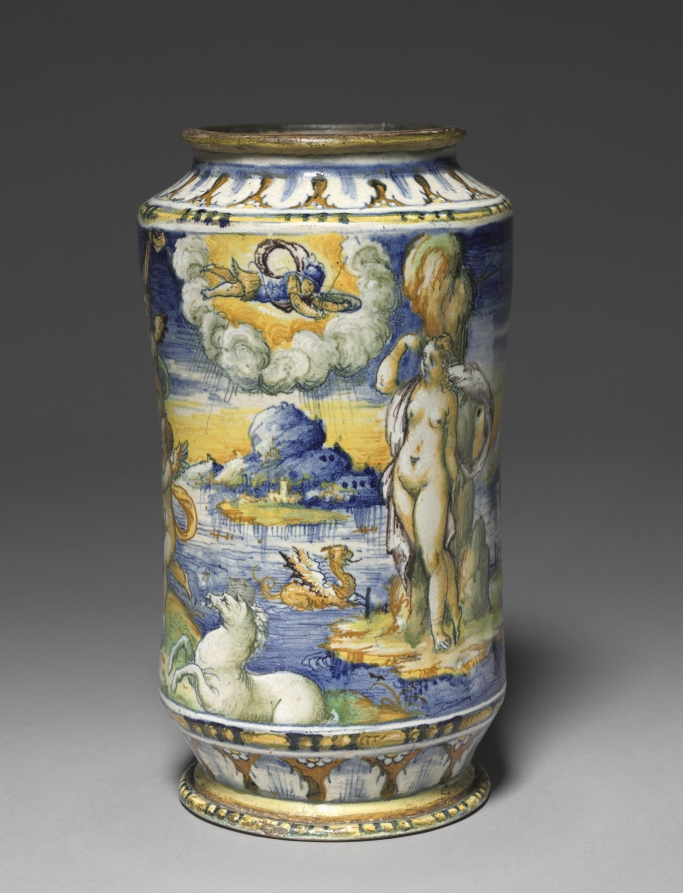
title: Pharmacy Jar (Albarello)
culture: Italy, Venice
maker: circle of Domenego da Venezia (Italian)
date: c. 1550–70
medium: tin-glazed earthenware (maiolica)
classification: Ceramic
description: Depictions of ancient myths were a popular subject for ceramic decoration during the Renaissance. This pharmacy jar features the myth of Perseus and Andromeda. According to Greek mythology, a sea monster was sent to destroy the kingdom of Ethiopia after Queen Cassiopeia offended the sea nymphs. To appease the gods, Andromeda was chained to a rock and offered as a sacrifice to the monster. Before the creature could devour her, Perseus flew in on his winged horse and slayed the beast.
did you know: Featuring a fashionably clad gentleman’s torso, this pharmacy jar displays the coat of arms of the Hercolani family, who made their fortune dealing in textiles for men’s clothing.